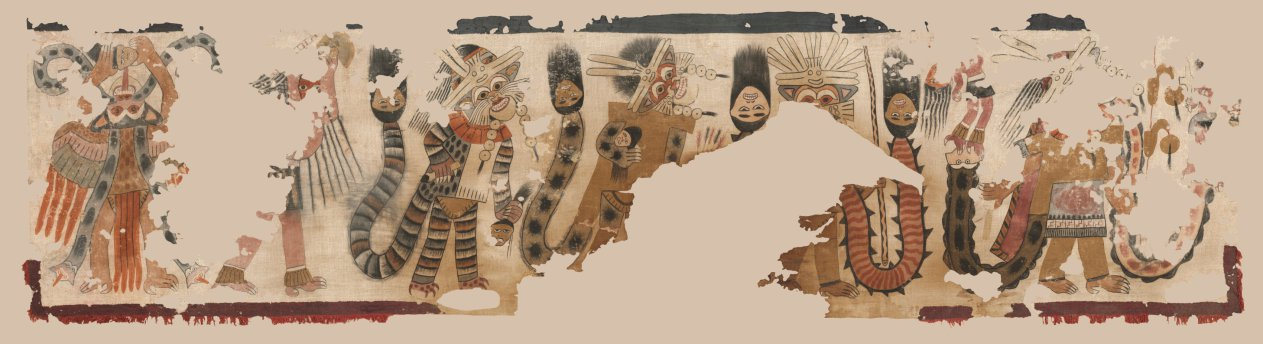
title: Cloth with Procession of Figures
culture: Central Andes, South Coast, Nasca people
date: 170 BCE–70 CE (radiocarbon date, 95% probability)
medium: cotton and pigment (field); camelid fiber (borders and fringe)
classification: Textile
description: Experts agree that this cloth is one of the greatest paintings to survive from Andean antiquity due to the realism, complexity, large size, and refined execution of its figures. All but one of the figures wear the whiskered mouth mask of Nasca supernatural beings and several carry or wear severed human heads, which the Nasca linked to nature’s fruitfulness. Thus, the figures seem to represent supernatural forces or humans personifying such forces during a ritual devoted to agricultural fertility. Originally, the panel was attached along its upper edge to a dark blue cloth of equal size. The complete textile may have served as a mantle (a shawl-like garment), a hanging, or a funerary offering.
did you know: Characteristics of the pampas cat and the emperor tamarin monkey are visible in the marching figures.